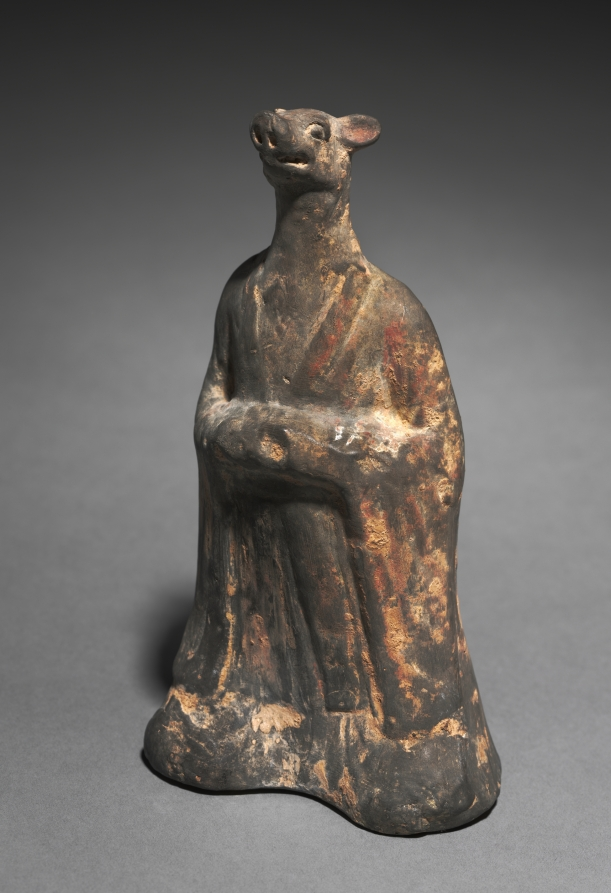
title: Mortuary Figure of the Zodiac Sign: Boar (Pisces)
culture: China, Northern Wei dynasty (386-534)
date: 500s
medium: gray earthenware with traces of slip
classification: Sculpture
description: The twelve-animal zodiac series—rat, ox, tiger, rabbit, dragon, snake, horse, goat, monkey, rooster, dog, and boar—signifies a traditional Chinese concept of time structured in a cyclical order. The twelve animals are also linked to the art of fortune-telling that underlies human existence in connection with the changes of the universe. The use of the twelve zodiac animals as tomb furniture suggests they provided a cosmological structure for the afterlife.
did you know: This figure with the head of a boar was originally painted with red and brown slip over a layer of white slip.